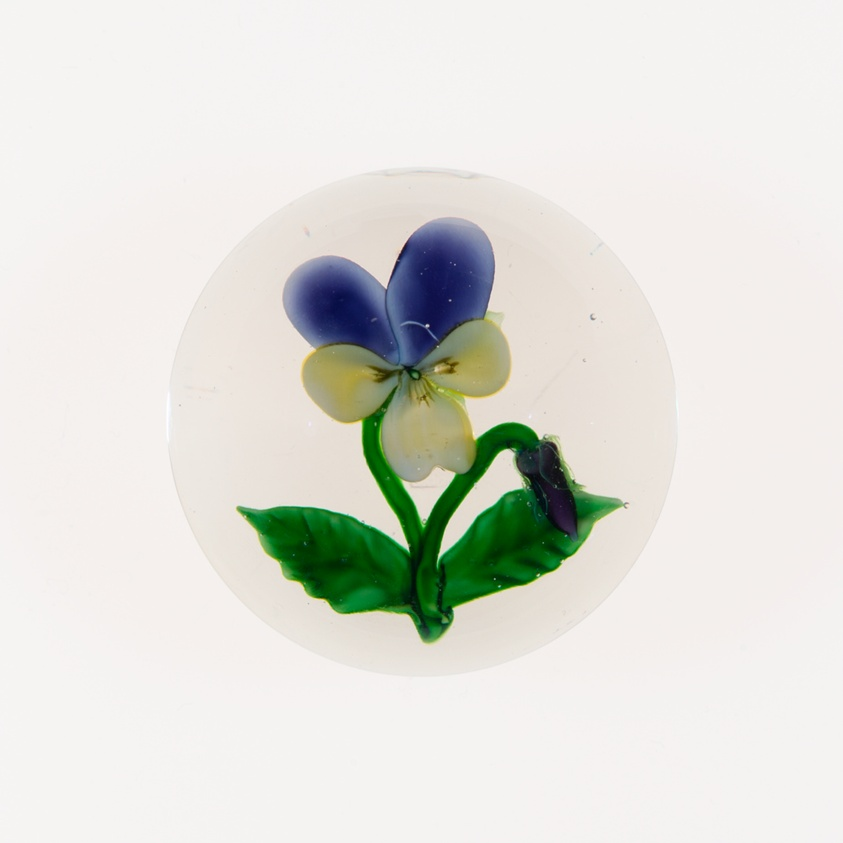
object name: Glass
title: Paperweight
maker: Clichy Glassworks (Cristalleries de Clichy); Clichy, France, 1837-1885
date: 19th century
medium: Glass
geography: Clichy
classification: paperweight; lampwork; european decorative arts; glass